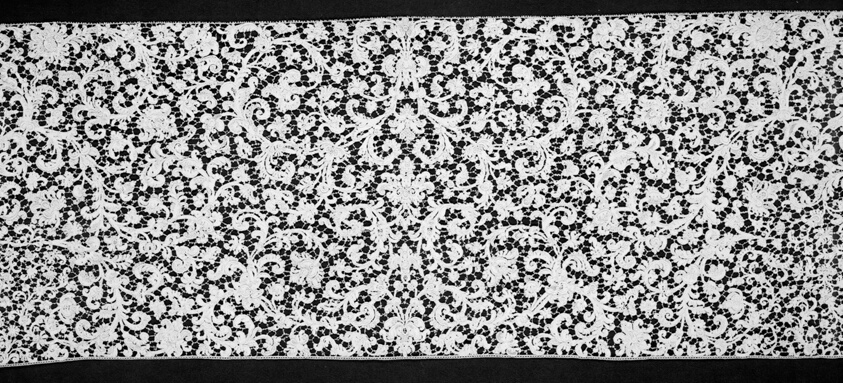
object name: Textile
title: Flounce (Incomplete)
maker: Italy, Venice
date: 1650/1700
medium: Linen, raised needle lace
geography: Italy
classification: textile; lace - needle